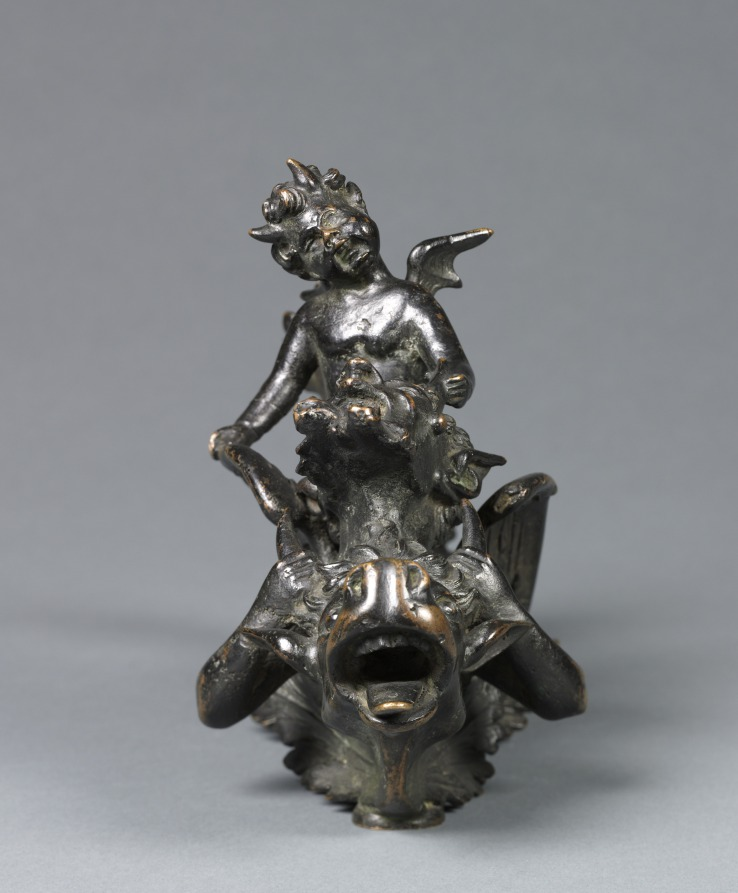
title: Doorknocker with Two Satyrs Riding an Ox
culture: probably Italy, Style of Padua, 16th Century, 19th century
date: 1800s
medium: bronze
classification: Sculpture